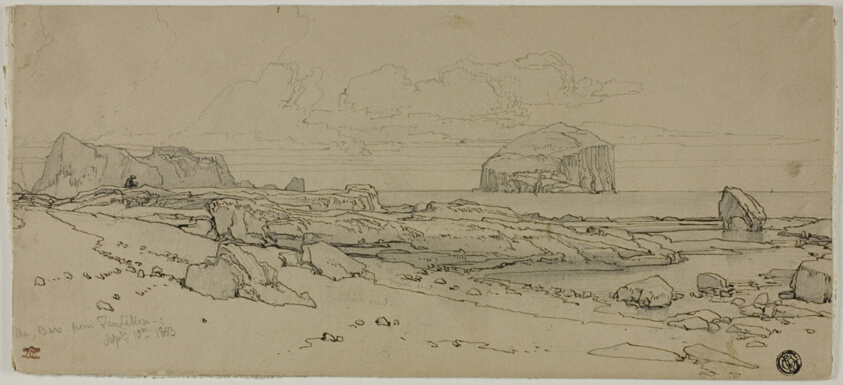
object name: Drawing and Watercolor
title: The Bars from Tantallon, Scotland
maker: William Leighton Leitch (Scottish, 1804-1883)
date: 1863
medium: Graphite, with stumping, and pen and brown and black ink, on tan wove paper, laid down on cream board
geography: Scotland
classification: pen and ink drawings; drawings (visual works); prints and drawing